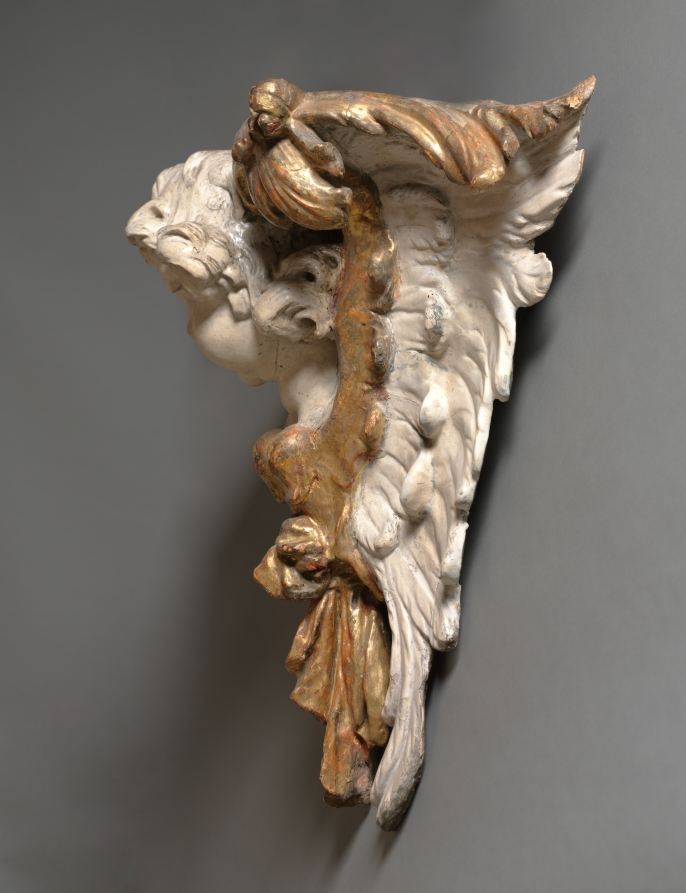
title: Head of an Angel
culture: Germany, 18th century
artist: Joseph Anton Feuchtmayer (German, 1696–1770)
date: c. 1750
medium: painted and gilded wood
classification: Sculpture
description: This decorative bracket was intended to simulate a functional supporting element at the top of a pilaster or beneath an organ loft or pulpit in a church. Joseph Anton Feuchtmayer, a member of a family of artists active in southern Germany and Switzerland, worked in a variety of media including wood and stucco. He often enlisted the aid of assistants, one of whom may have executed this work.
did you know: Part of the angel's wings are made more luxurious by the addition of gold paint, a process called "gilding."